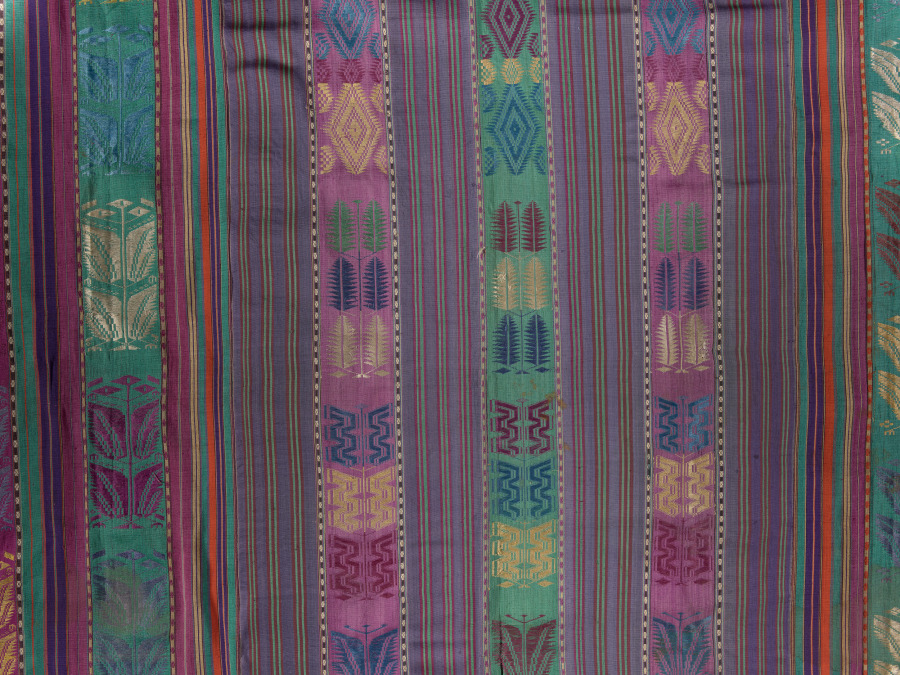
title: Wrapper (Lamba Akotifahana)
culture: Madagascar, Merina Kingdom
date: 1800s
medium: Silk (Bombyx mori)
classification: Textile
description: A lamba is an untailored textile worn by all ages, classes, and genders across much of Madagascar. The lamba akotifahana takes its name from the weft-float motifs (akotifahana) that adorn it. Weavers added extra weft (horizontal) threads to make them. Representing the final production of lamba akotifahana during the Merina Kingdom before French colonization (1897), this example is densely covered with motifs.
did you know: The motifs on this weaving are not symbolic; the weaver chose them for aesthetic reasons.